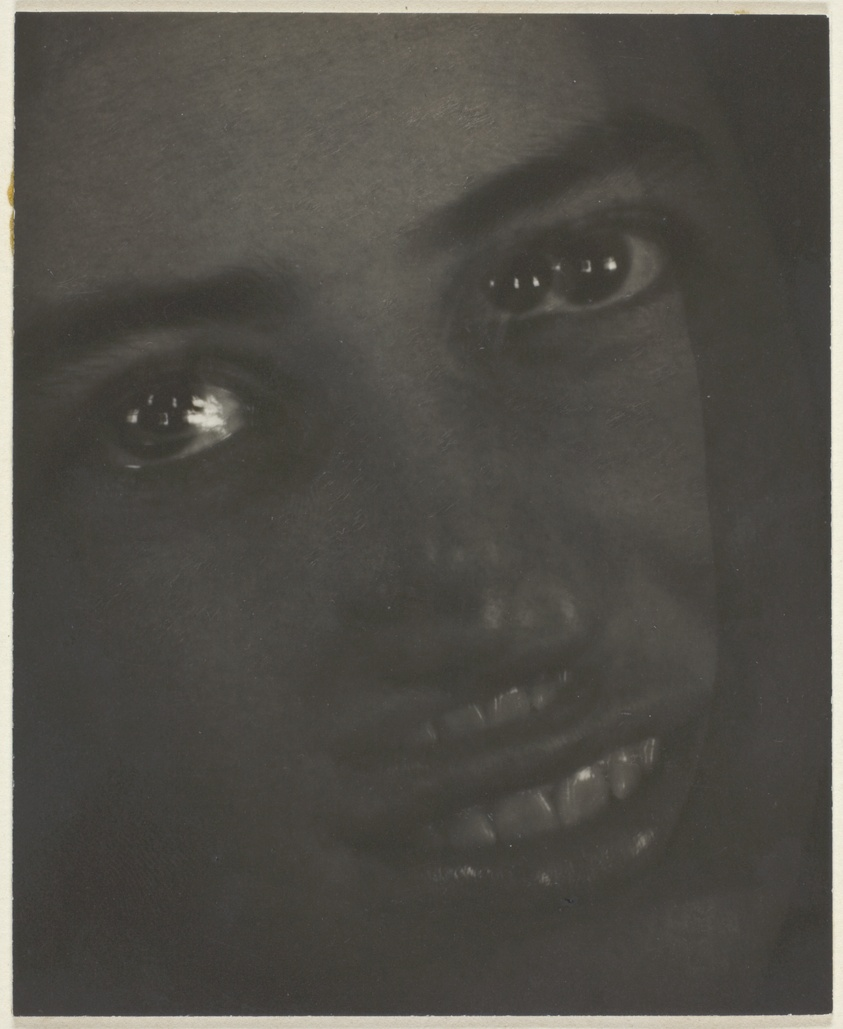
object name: Photograph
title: Dualities - Dorothy Norman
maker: Alfred Stieglitz (American, 1864–1946)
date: 1932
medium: Gelatin silver print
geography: United States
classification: gelatin silver (developing-out-paper) pr; photographic process; photography; photograph